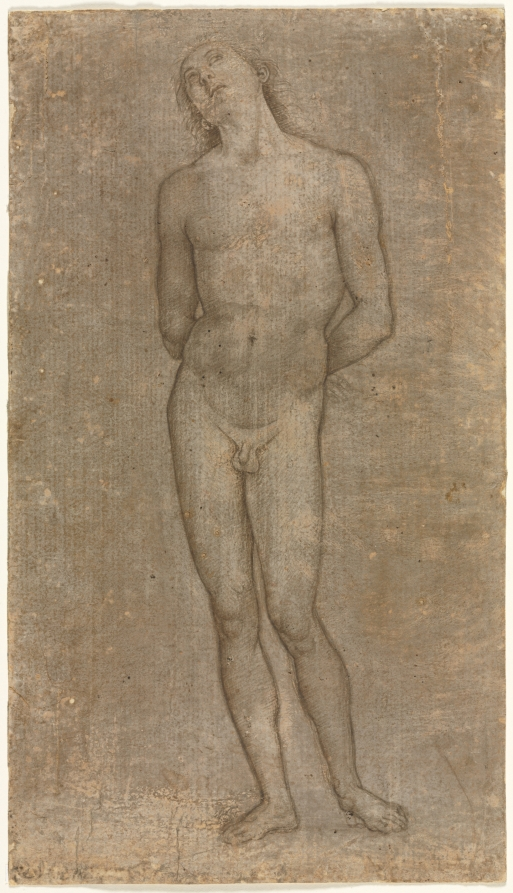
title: Saint Sebastian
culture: Italy, 15th century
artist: Perugino (Italian, c. 1450/55–1523)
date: c. 1493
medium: metalpoint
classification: Drawing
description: The Florentine painter Perugino made drawings to record figural types and poses that could be repeated throughout his finished paintings. He used the elegant, graceful figure seen here, with its soft athletic body and upwardly turned gaze, in at least two paintings of the 3rd-century martyr Saint Sebastian (the related paintings are now in the collection of the Galleria degli Uffizi, and the Louvre). Sebastian was shot with arrows after being exposed as a Christian convert; he was particularly revered during the Renaissance as a protector against illness such as the plague. Portrayal of the saint required Perugino to express his knowledge of human anatomy, while evoking the gentle s-curve associated with classical sculpture. Drawn with metalpoint, a typical drawing medium in the 1400s, the reinforced lines along the contour of the figure indicate that it was probably used by the artist or by one of his many studio assistants to transfer the design to another sheet.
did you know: The elegant pose of Saint Sebastian here was used by the artist in at least two finished paintings of the saint.